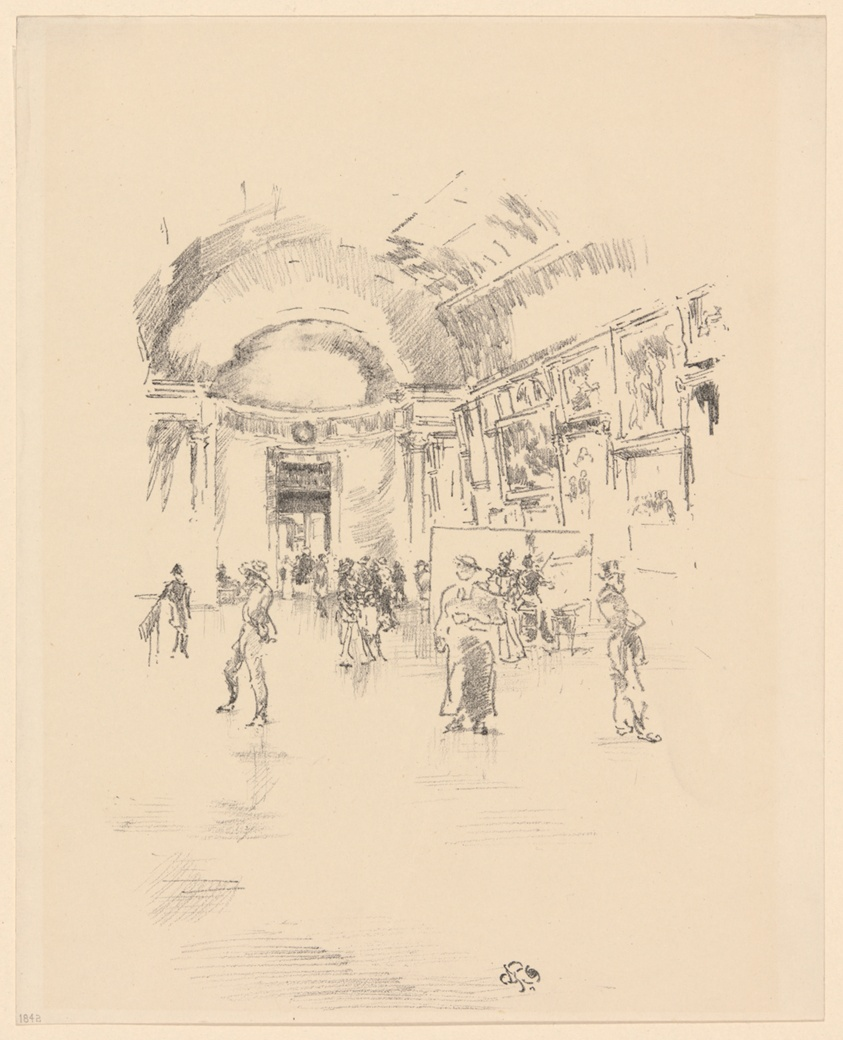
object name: Print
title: The Long Gallery, Louvre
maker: James McNeill Whistler (American, 1834-1903)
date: 1894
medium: Transfer lithograph in black with stumping, on cream wove paper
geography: United States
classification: transfer lithograph; lithograph; print; prints and drawing; paper